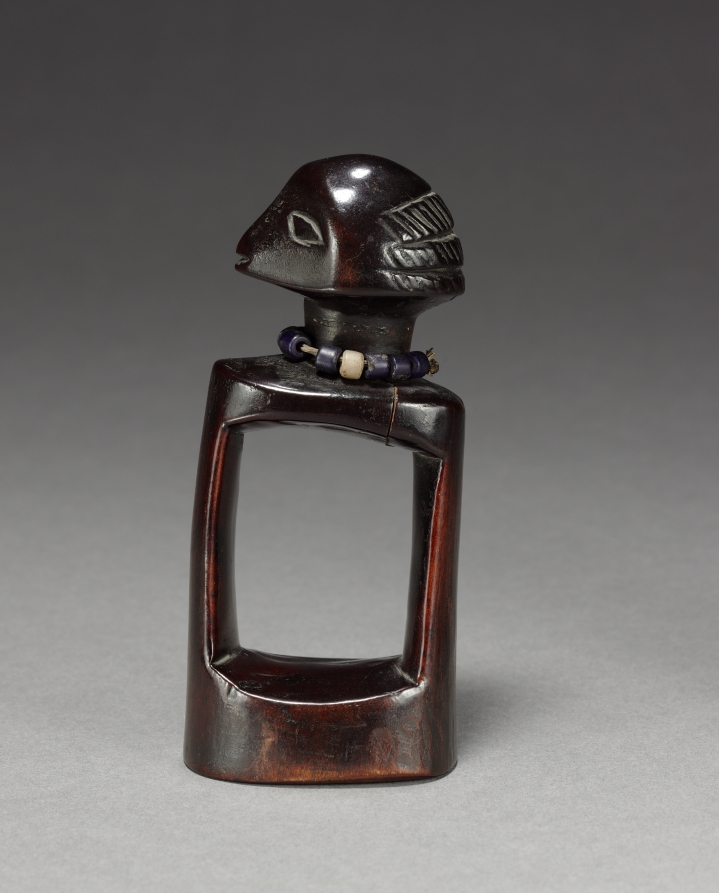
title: Divination Implement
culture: Africa, Central Africa, Democratic Republic of Congo, Luba-style maker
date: late 1800s–early 1900s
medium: Wood, glass beads, and natural fiber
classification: Sculpture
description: This device helped contact an ancestral spirit who clarified misfortunes. The diviner awakened the ancestor by anointing the rectangular frame of the figurine with pungent basil leaves. Sitting on a textured woven mat, the diviner held one side of the instrument while the client held the other. The diviner then posed questions to the ancestor who responded through certain movement signaling affirmation.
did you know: This divination implement is a kakishi (embodiment of an ancestor) device that connects the diviner and the client to the spirit they wish to contact.